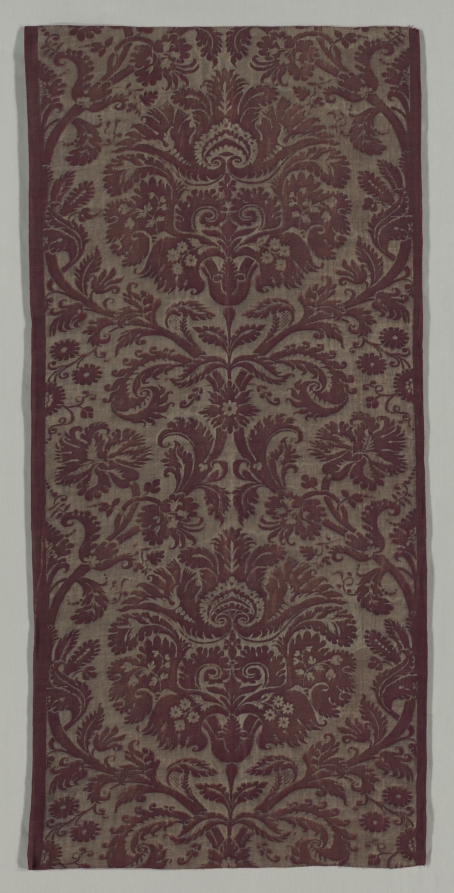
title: Reproduction of a Florentine Velvet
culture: Italy, Venice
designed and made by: Mariano Fortuny y Madrazo (Spanish, 1871–1949)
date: c. 1937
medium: cotton, printed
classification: Textile